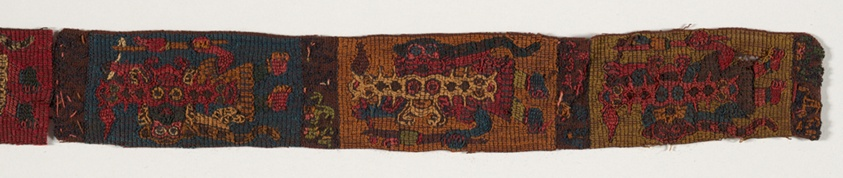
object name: Textile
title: Fragments (Border)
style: nazca, paracas, andean, andes, Pre-Columbian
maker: Nazca; Peru, south coast, Nazca Valley, Coyungo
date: 100 B.C./A.D. 200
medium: Cotton, plain weave; embroidered with camelid wool and cotton in stem and running stitches.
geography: Peru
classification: textile; needlework (visual works)